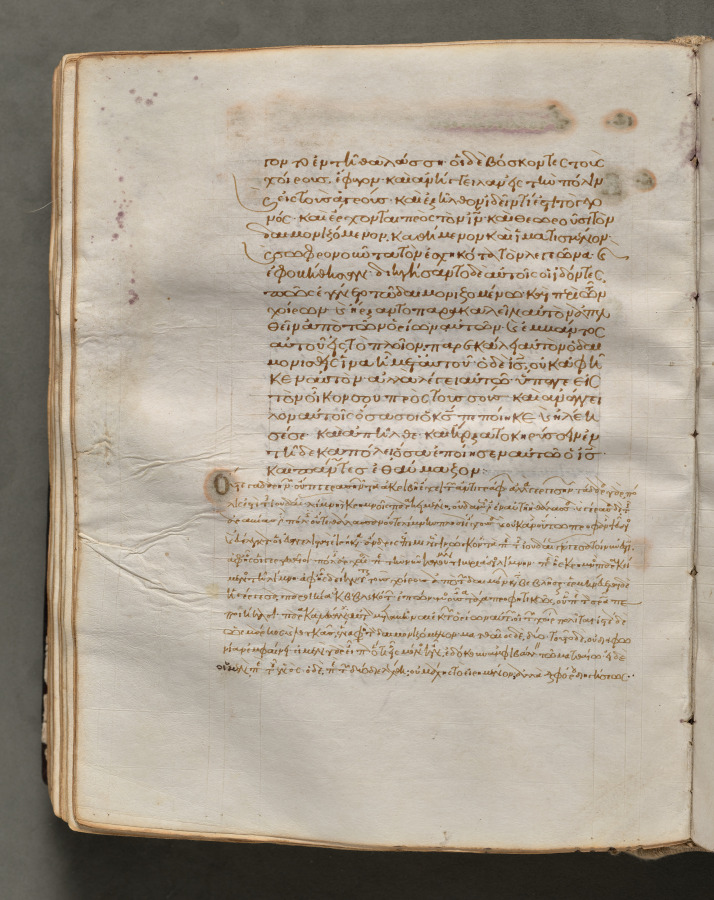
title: Text, folio 147 (verso), from a Gospel Book with Commentaries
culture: Byzantium, Constantinople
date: c. 1000–1100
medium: ink, tempera, and gold on vellum; leather binding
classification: Bound Volume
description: Each of the four gospels in this book opens on a page with brilliantly illuminated borders depicting the author of the text as well as birds-principally peacocks, symbols of the immortality of the soul-and fountains, representing the fountain of life and the salvation of the soul. This volume consists of 428 leaves with texts in Greek. Its level of sophistication suggests that it was probably written and decorated in a monastery in Constantinople.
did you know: Gospel Books were carried in procession through Byzantine churches.